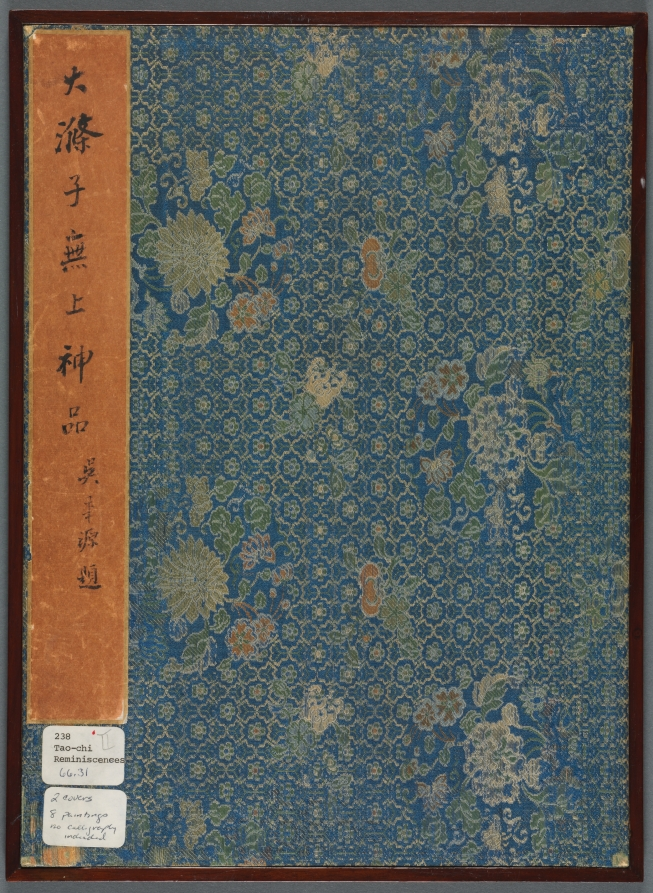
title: Reminiscences of Qinhuai River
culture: China, Qing dynasty (1644-1911)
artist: Shitao (Chinese, 1642–1707)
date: 1642–1707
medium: Album of eight leaves, ink and color on Song paper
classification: Painting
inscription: 大滌尊者濟 [印]原濟; 石濤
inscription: 沿溪四十九迴折，搜盡秦淮六代奇。/ 雪霽東山誰着屐，風高西壑自成詩。/ 應憐孤冷長無伴，其剩槎牙只幾枝。/ 滿地落花春未了，酸心如豆耐人思。/ 仲賓先生以宋紙十幅寄余真州命畫。因憶昔時秦淮探梅聚首之地，寫此就教。清湘石濤濟道人。[印]原濟; 石濤.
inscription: 2 colophons and 15 additional seals: 1 colophon, dated 1937, and 1 seal of Wu Huayuan 吳華源 (1893–1972); 1 colophon, dated 1938, and 2 seals of Wu Hufan 吳湖帆 (1894–1968); 1 seal of C. C. Wang 王季遷 (1907–2003); 11 seals unidentified.